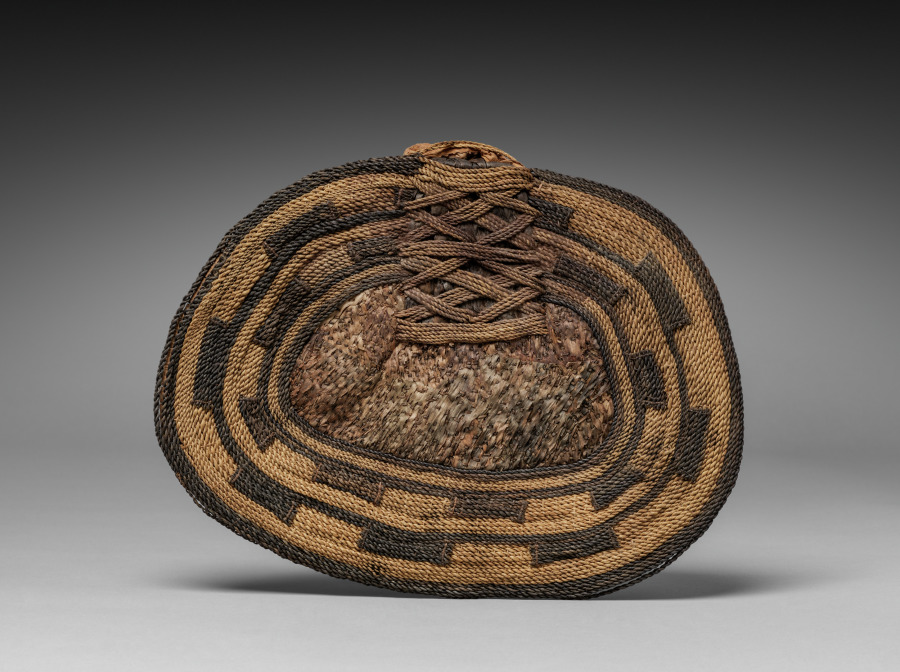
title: Back Skirt / Sitting Pad (negbe)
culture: Africa, Central Africa, Democratic Republic of the Congo, Mangbetu-style maker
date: before 1929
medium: Plant fibers and dye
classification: Garment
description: Egbe (singular: negbe) were fashionable and practical garments aristocratic Mangbetu women made for special occasions. Worn over a skirt, it tied onto a girdle along with a frontal “apron.” The curved interior piece rested on the lower back. Thickly woven, flexible natural fibers bent with the body, cushioning the wearer’s behind when sitting. When the woman was standing, the decorated flat portion faced outward, showing off bold geometric motifs. Egbe were among items sold to foreigners at the Mangbetu king’s encouragement as the Mangbetu actively constructed their self-image for outsiders during the 1920s and 1930s.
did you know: A contemporary fashion in 1929, when it was purchased or collected, this negbe is now a historical document of past styles.